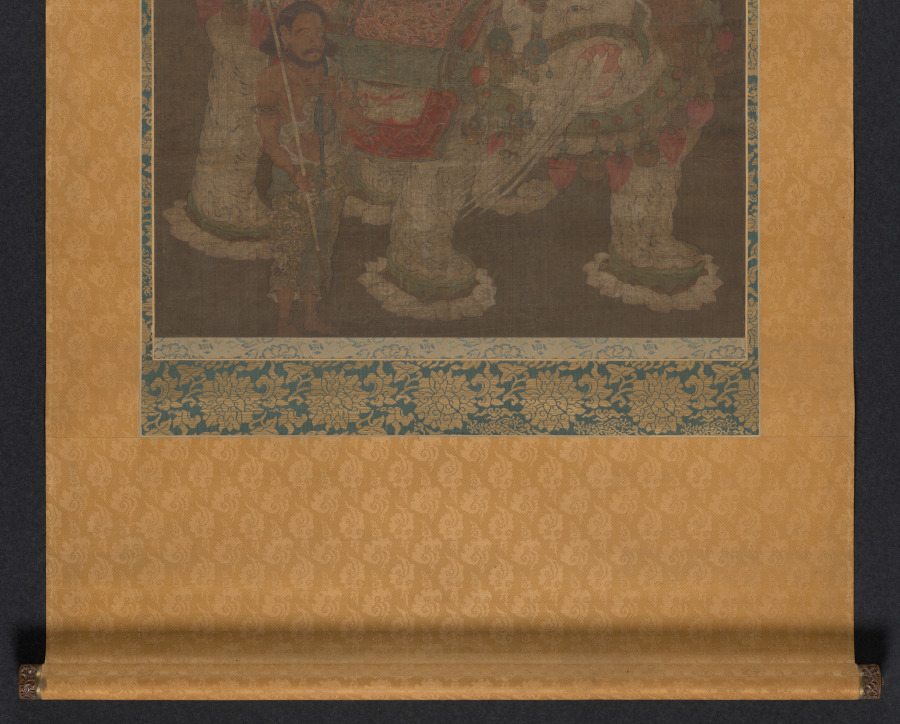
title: Samantabhadra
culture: China, Southern Song dynasty (1127-1279)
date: 1100s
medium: hanging scroll; ink and color on silk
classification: Painting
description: In the last chapter of the Lotus Sutra, one of the principal Buddhist texts, the great Bodhisattva Samantabhadra is described advancing to earth, riding on a six-tusked elephant, and proclaiming himself protector of the faithful. More frequently, he is shown with Bodhisattva Manjusri as the attendants of Shakyamuni (the historical Buddha). This scroll is probably the left panel in a triptych (group of three paintings) portraying these deities.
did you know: Samantabhadra holds a lotus with a sutra on top of the blossom.